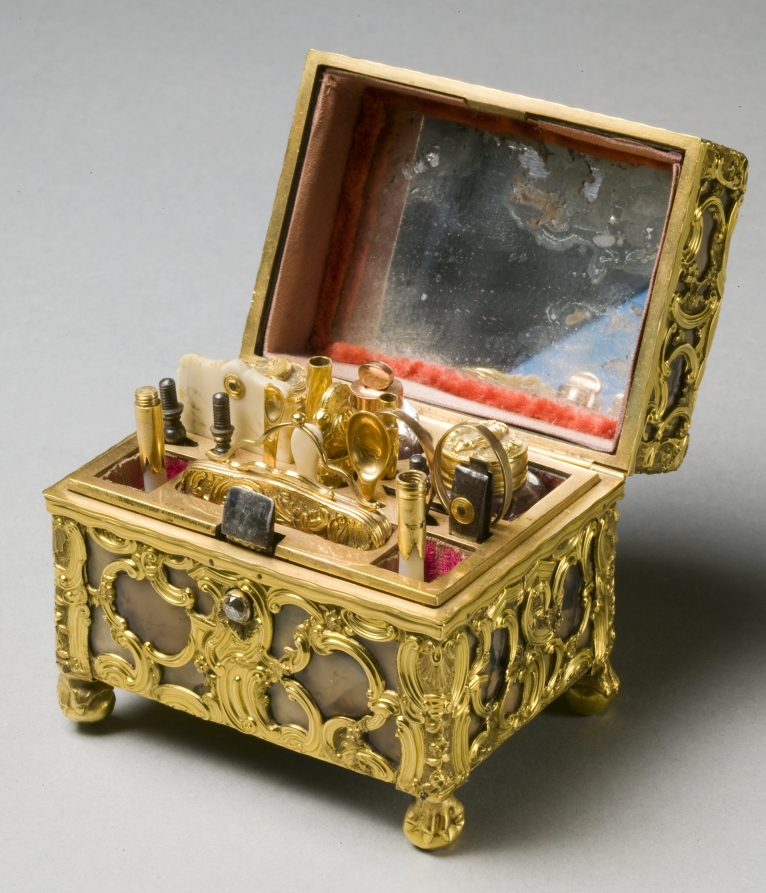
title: Vanity Case (Nécessaire)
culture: England, mid 18th century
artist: or James Barbot (British)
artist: manner of James Cox (British)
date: c. 1750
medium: agate and gold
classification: Miscellaneous